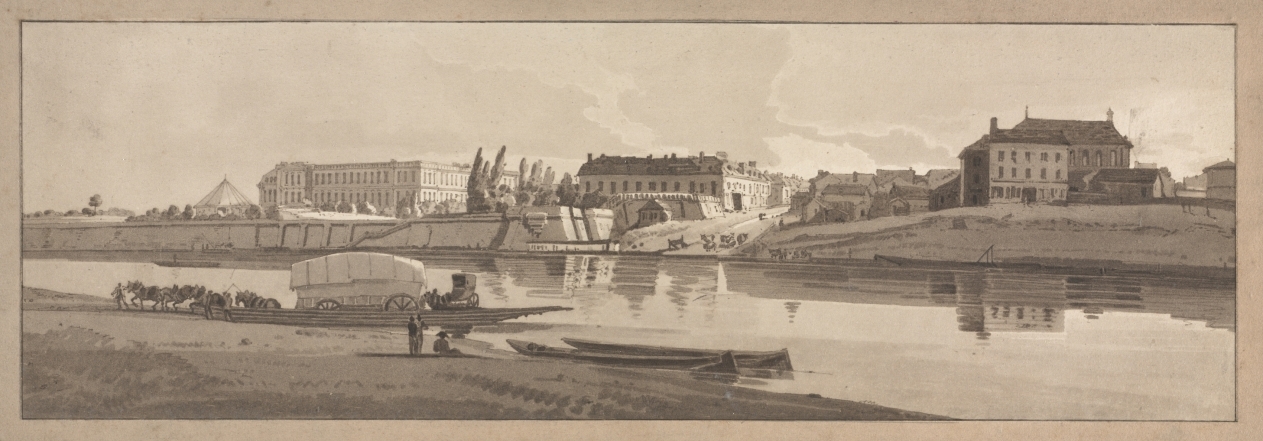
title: A Selection of Twenty of the Most Picturesque Views in Paris: View of the Palace & Village of Choisi on the Banks of the Seine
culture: England, 19th century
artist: Thomas Girtin (British, 1775–1802)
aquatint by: Frederick Christian Lewis (British, 1779–1856)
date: 1802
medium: softground etching and aquatint printed in brown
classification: Print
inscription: Lower margin, in pencil: View of the Palace & Village of Choisi Early proof